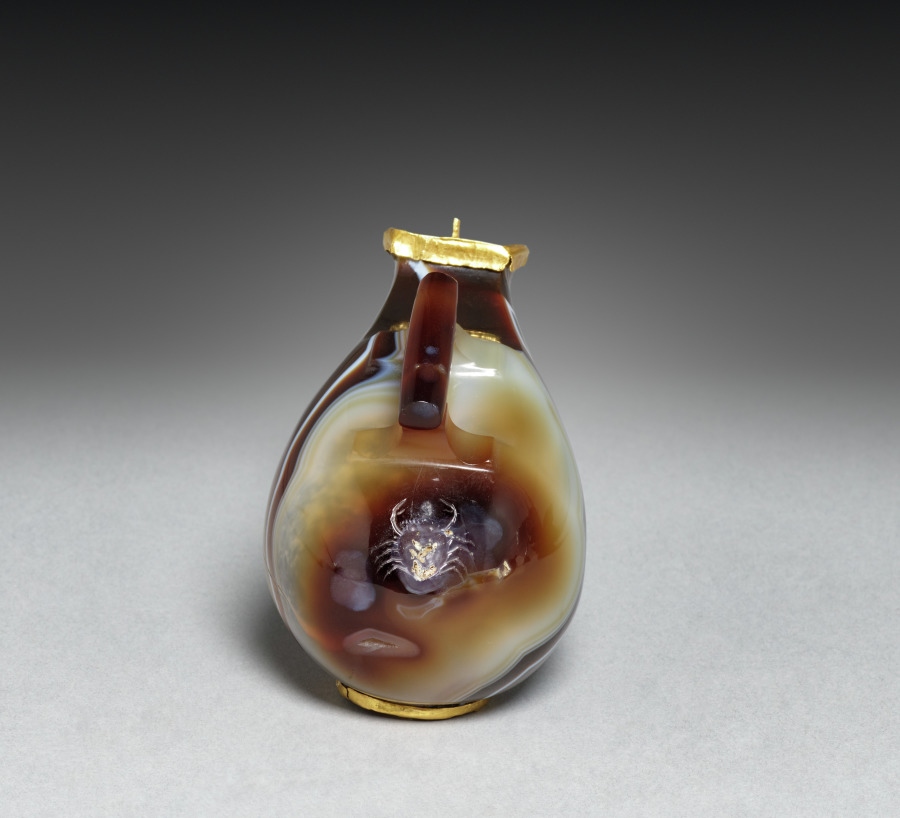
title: Askos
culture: Greece, Ptolemaic Dynasty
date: 200–1 BCE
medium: agate and gold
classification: Cosmetic Objects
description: This miniature vessel was carved from a single piece of banded agate, polished to a shine, and embellished with a gold lid and gold details on the base. Inside the ring of gold at the base is a trio of gold papyrus stalks, a likely reference to Egypt. In shape, it resembles an ancient wineskin, or askos, though its small size suggests use for luxury perfumes or oils. A tiny crab, likely once inlaid with a precious material, has been carved behind the handle.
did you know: The knob on the lid connects to a hidden disk to control the flow of liquid.